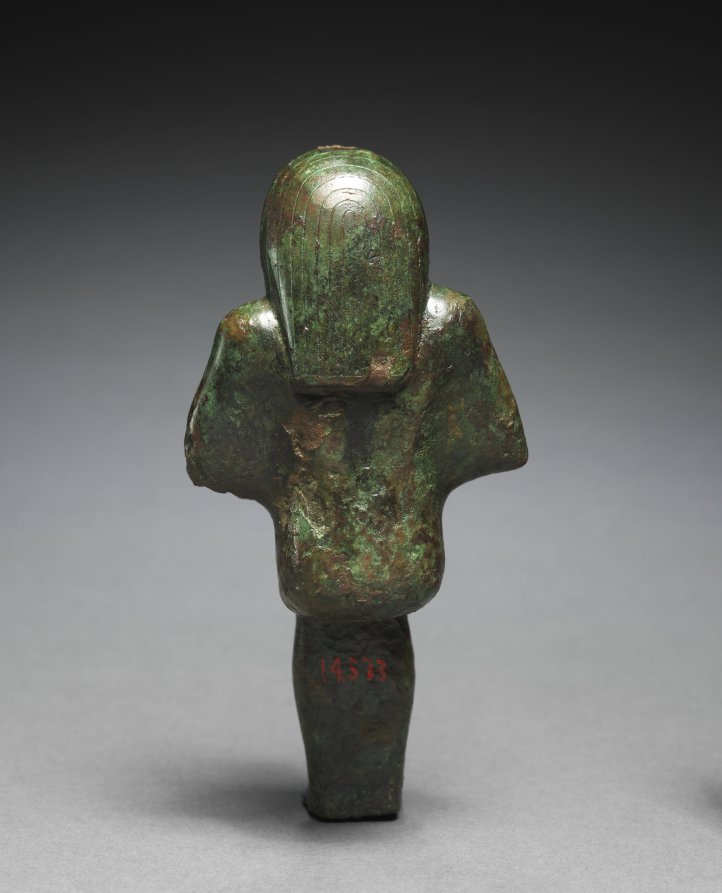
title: Statuette of Seated God, probably Osiris-lah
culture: Egypt, Late period (715–332 BCE), Dynasty 26 or later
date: 664–525 BCE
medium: bronze, solid cast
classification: Sculpture